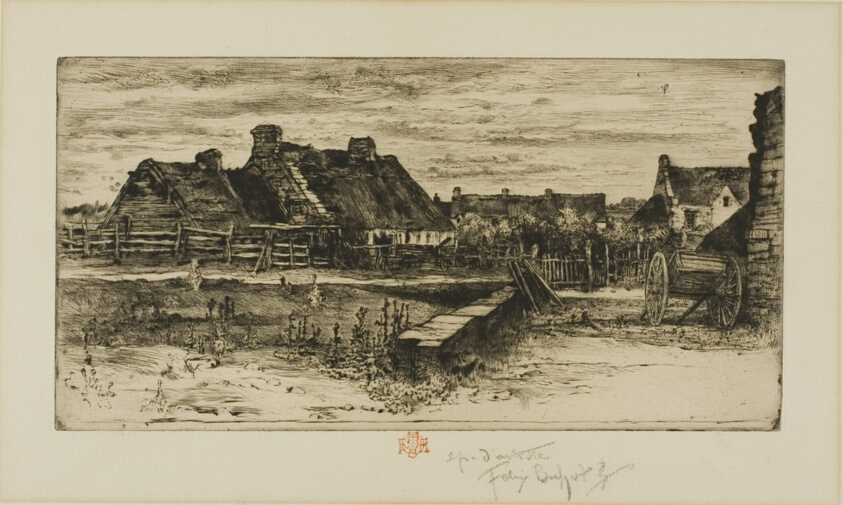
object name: Print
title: The Large Thatched Cottages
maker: Félix Hilaire Buhot (French, 1847-1898)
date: 1881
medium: Etching and drypoint on ivory laid paper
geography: France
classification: etching; print; prints and drawing